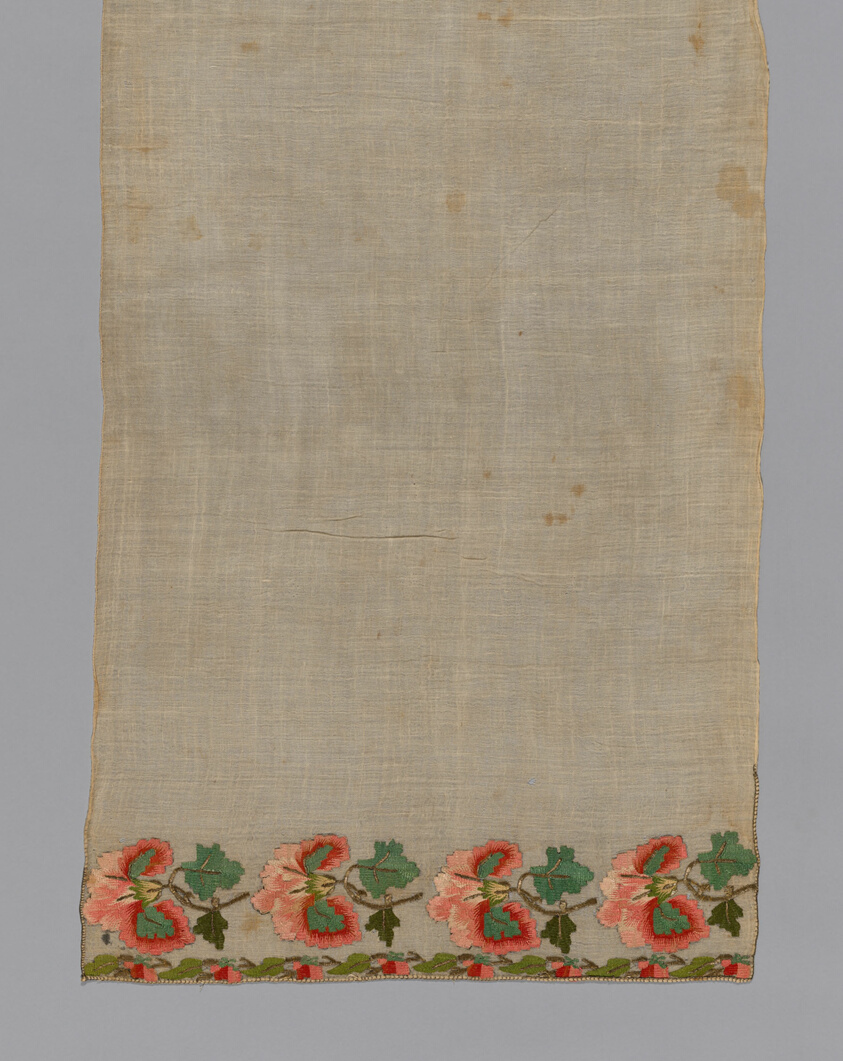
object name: Textile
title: Towel or Napkin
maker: Turkey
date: 18th century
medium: Embroidered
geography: Turkey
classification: textile; weaving; needlework (visual works)